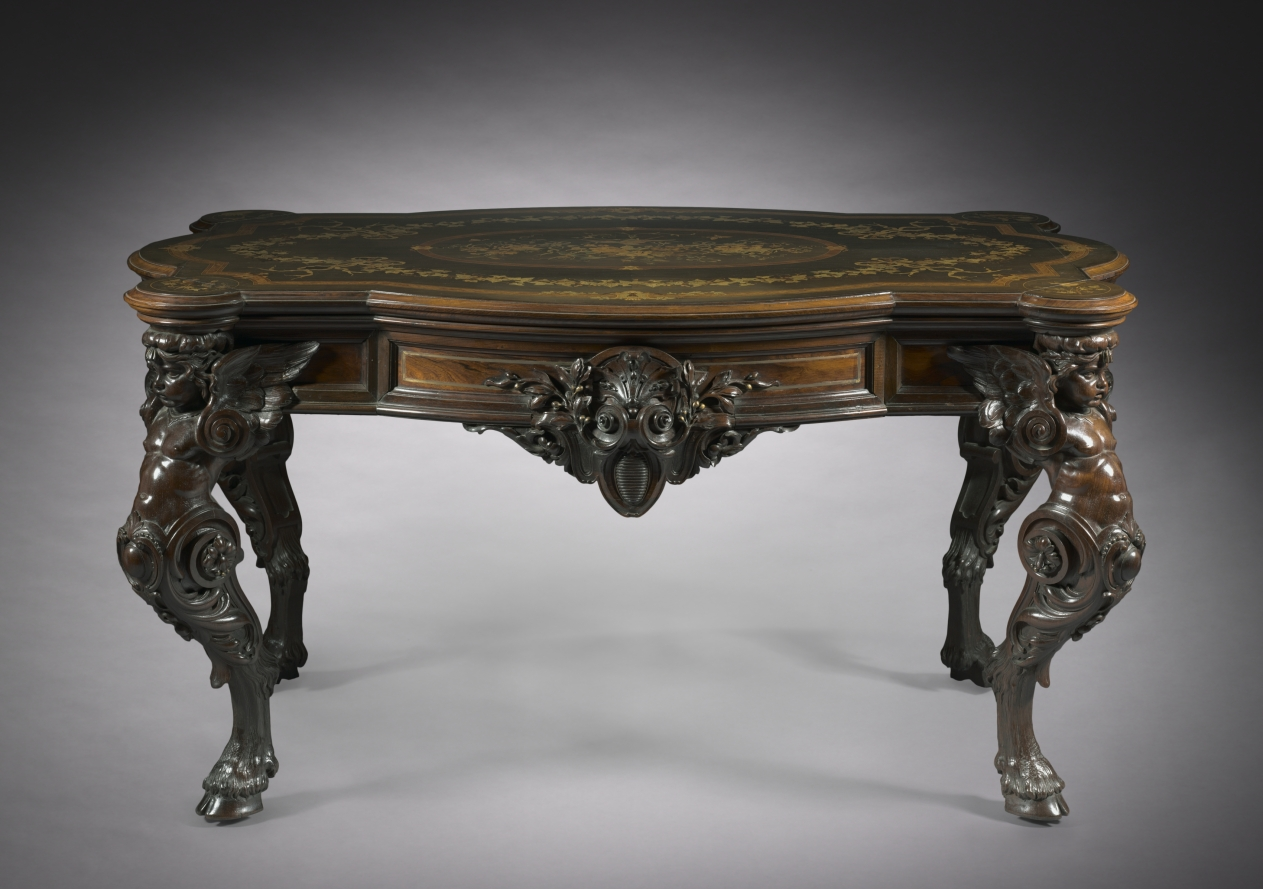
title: Center Table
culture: America, New York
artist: Gustave Herter Firm (American)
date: c.1860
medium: rosewood with marquetry of various woods, brass inlay, and gilding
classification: Furniture and woodwork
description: Gustave Herter was born in Germany and came to America about 1848. This table can be identified as his work because of its close resemblance to a table supplied by Herter about 1860 to the Victoria Mansion in Portland, Maine. The pictorial marquetry of the top may have been imported from France and incorporated into this table, probably made in New York.